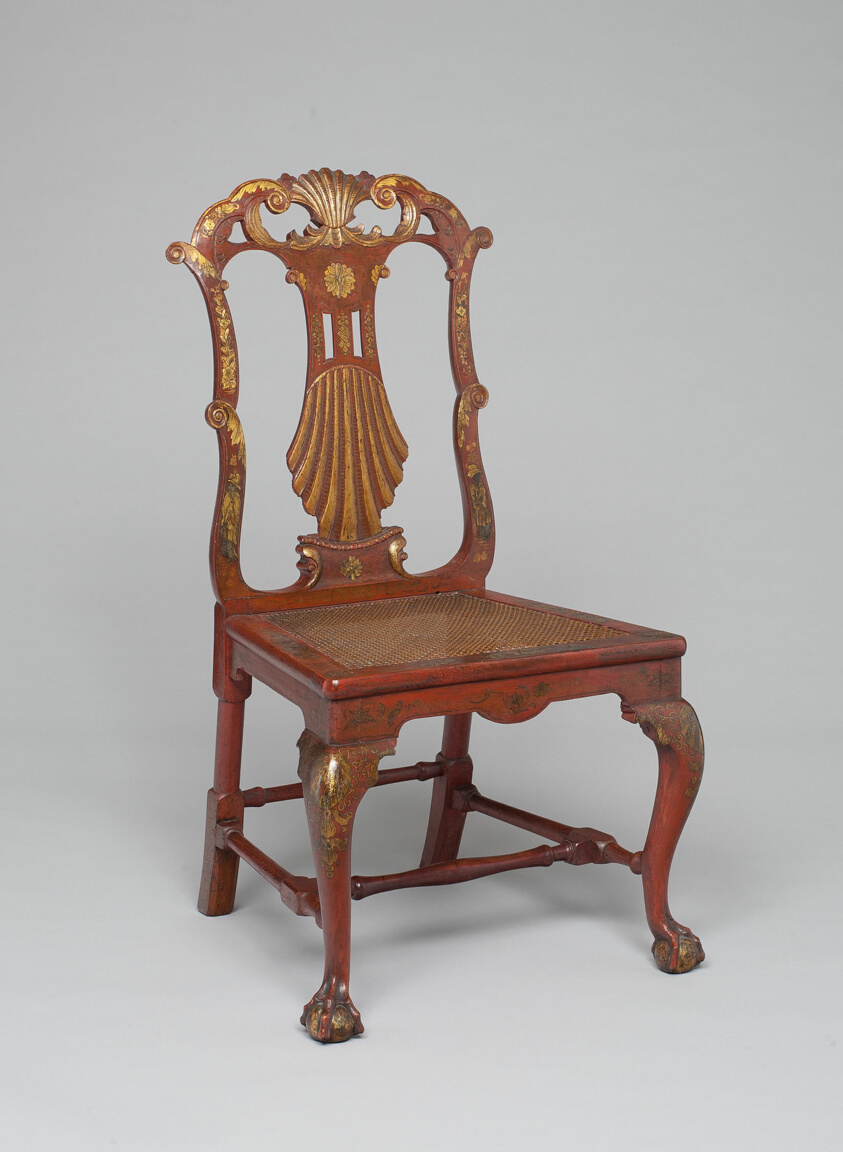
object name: Furniture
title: Chair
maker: Attributed to Giles Grendey (English, 1693–1780); England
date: c. 1735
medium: Wood with red and gold lacquer decoration and caned seat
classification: chair; seating; furniture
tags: furniture